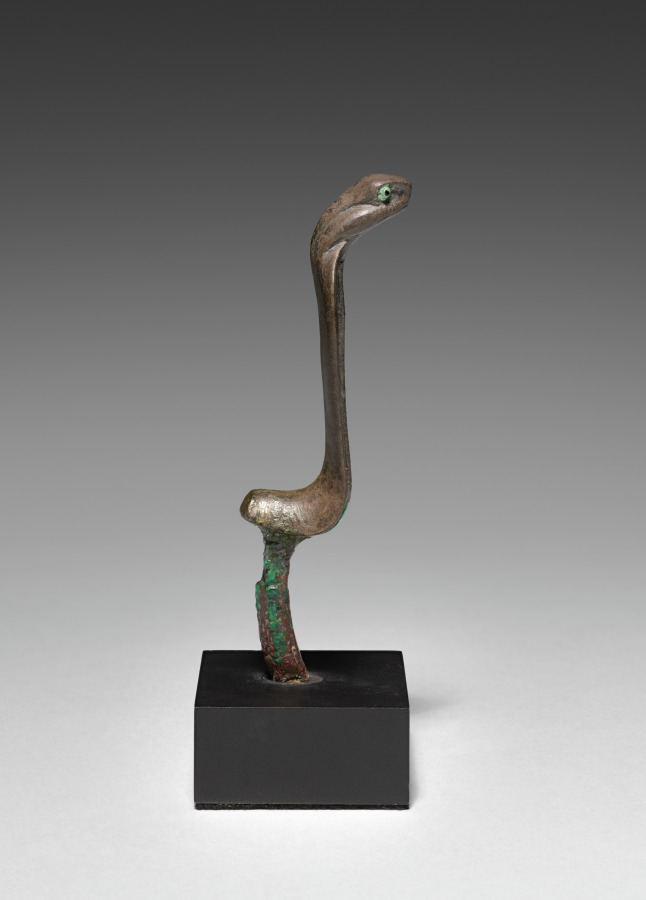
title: Uraeus (Rearing Cobra)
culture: Egypt, New Kingdom (1540–1069 BCE), Dynasty 19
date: 1307–1196 BCE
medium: Silver-copper alloy with inlays (copper, feldspar, turquoise, obsidian?) and gilding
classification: Metalwork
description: Made from a silver-copper alloy, this rearing cobra likely served as a uraeus, symbolizing royal or divine power in ancient Egypt. Its lowermost portion likely fit into the top of the head of a large sculpture, while its body and tail seem cut short, perhaps making room for a solar disk to rise up behind. The eyes are inlaid, and six cavities for additional inlay remain on the expanded hood, the lowermost still intact, the others likely once filled with brightly colored blue and red stone. Much of the remaining surface may once have been gilded, to judge from remaining traces of gold on the back.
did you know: The word uraeus comes from an Egyptian term for “rising/rearing up,” describing the cobra’s position.